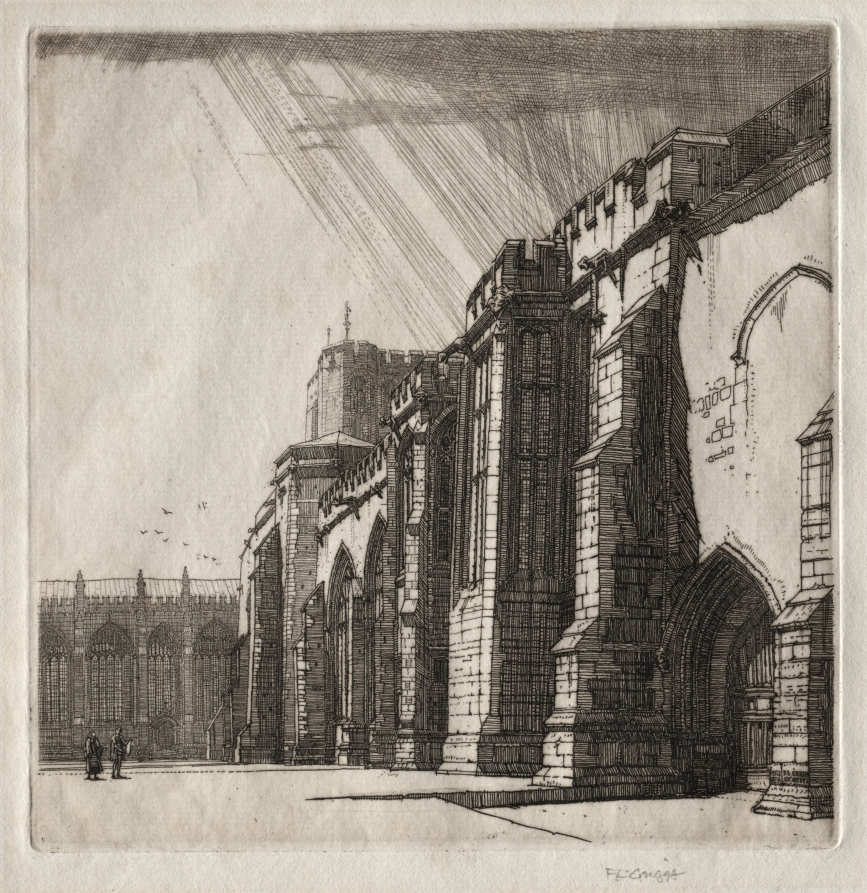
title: The Palace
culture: England, 20th century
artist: Frederick Landseer Maur Griggs (British, 1876–1938)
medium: etching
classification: Print